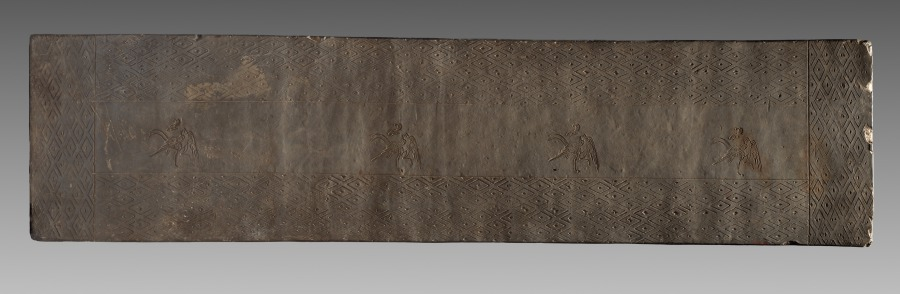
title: Tomb Tile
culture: China, Henan province, Jincun, Eastern Zhou dynasty (770–256 BCE)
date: 771–256 BCE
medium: earthenware with stamped decoration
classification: Ceramic